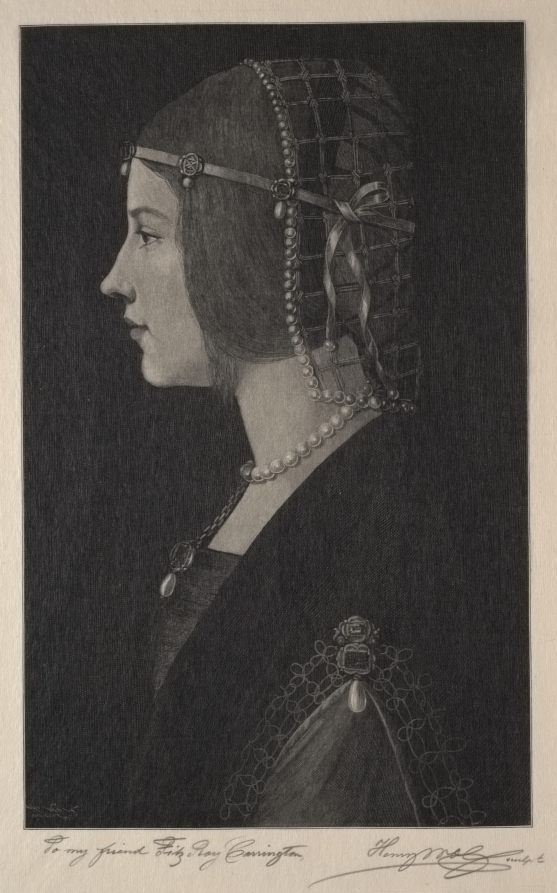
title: Beatrice d'Este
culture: America, early 20th Century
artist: Henry Wolf (American, 1852–1916)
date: 1907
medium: wood engraving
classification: Print